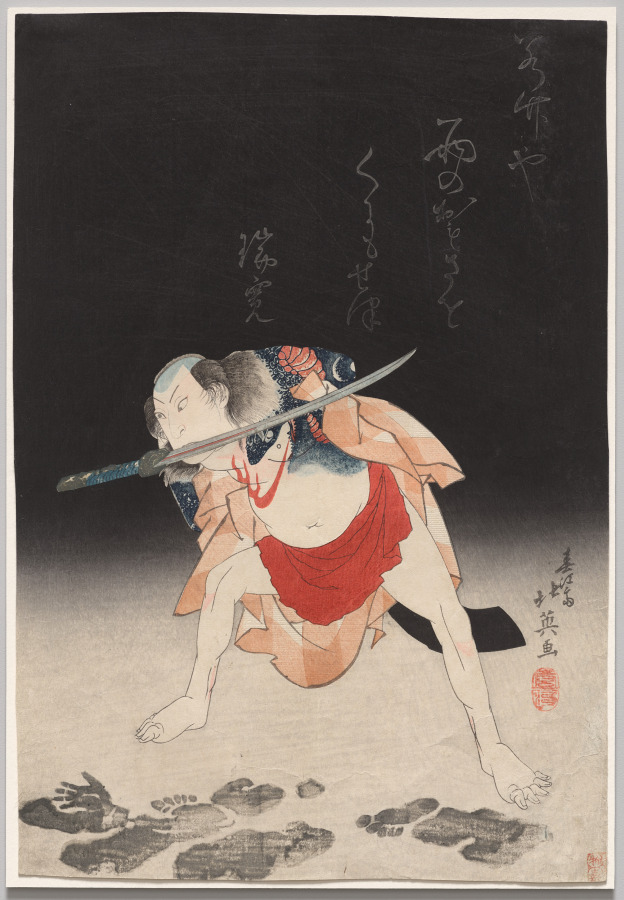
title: Arashi Rikan II as Danshichi Kurōbei in "Mirror of Naniwa: The Summer Festival"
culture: Japan, Edo period (1615–1868)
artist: Shunbaisai Hokuei (Japanese, d. 1837)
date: 1832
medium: color woodblock print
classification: Print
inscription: Signature: Shunkosai Hokuei ga. seal: Shunko.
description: This print shows Arashi Rikan II (1788–1837) acting in a Kabuki play put on at the Chikugoza Theater in Osaka in 1832. Rikan’s character, Danshichi Kurōbei, was among the otokodate roles, or men who stood up for those without much power in society. Mirror of Naniwa: The Summer Festival remains popular today and has the most well-known Kabuki murder scene, in which Danshichi kills his devious father-in-law, Mikawaya Giheiji. Rikan strikes multiple dramatic poses, called mie, during the episode, which features real mud on the stage.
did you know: This belongs to a category of Japanese prints called “actor images” (yakusha-e or 役者絵), which were collected by fans of popular Kabuki actors.